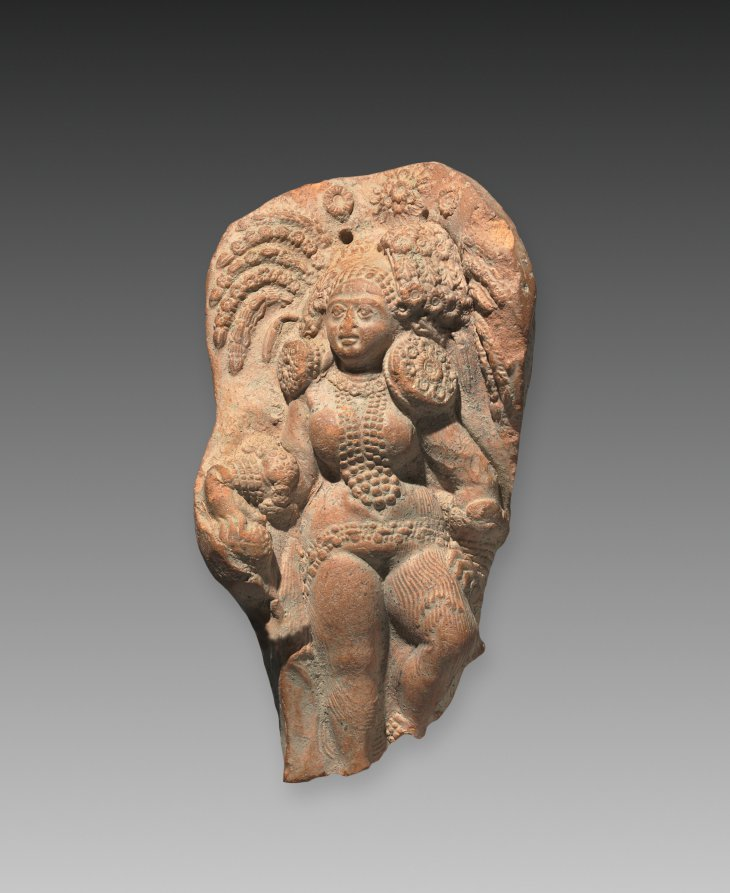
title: Female Figure, Probably a Nature Divinity (Yakshi)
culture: India, Shunga period (185–78 BCE)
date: c. 75 BCE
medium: terracotta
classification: Sculpture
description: This powerful female figure, softly modeled with full volumes, is heavily adorned with jewels and flowers. In her right hand she grasps a fruit and her left rests on her hip. A sense of movement is achieved through her raised left leg, curving pleat lines, swinging beads of her necklace, and her turning head.